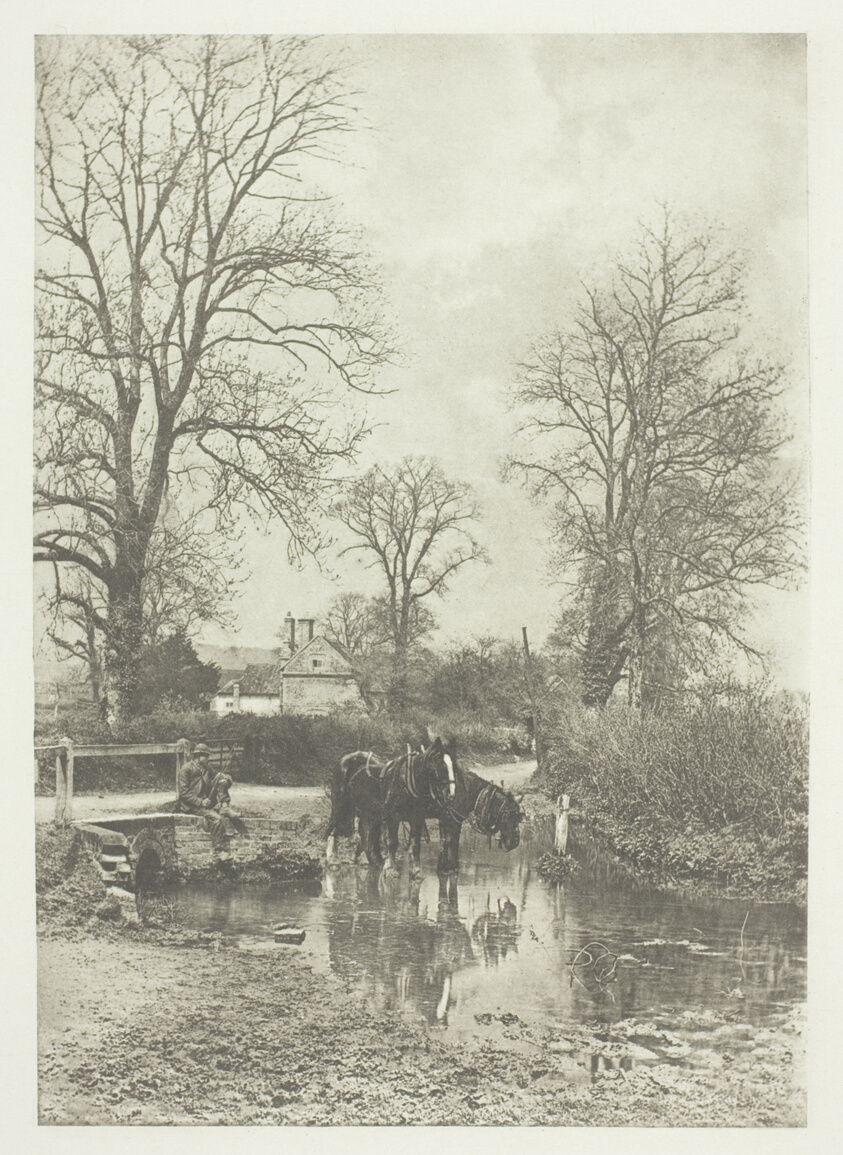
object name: Photograph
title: Sleepy Hollow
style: 19th century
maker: Mr. J. Gale (English, died 1906)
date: c. 1889, printed 1889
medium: Photogravure, from "Sun Artists, Number 1" (1889)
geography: England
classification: photogravure; photomechanical process; photography; photograph